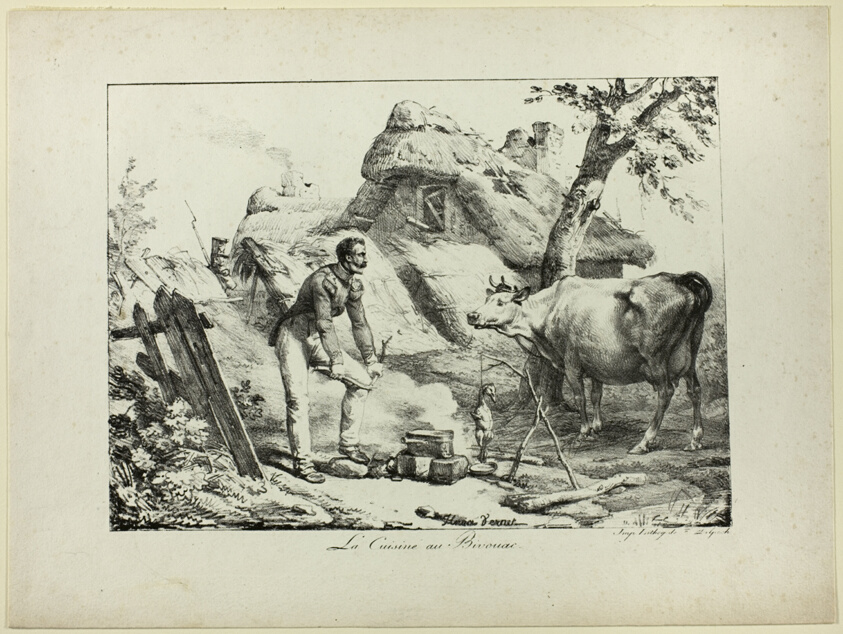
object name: Print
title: Bivouac Kitchen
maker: Horace Vernet (French, 1789-1863); printed by Francois Seraphin Delpech (French, 1778-1825)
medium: Lithograph in black on ivory wove paper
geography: France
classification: lithograph; print; prints and drawing